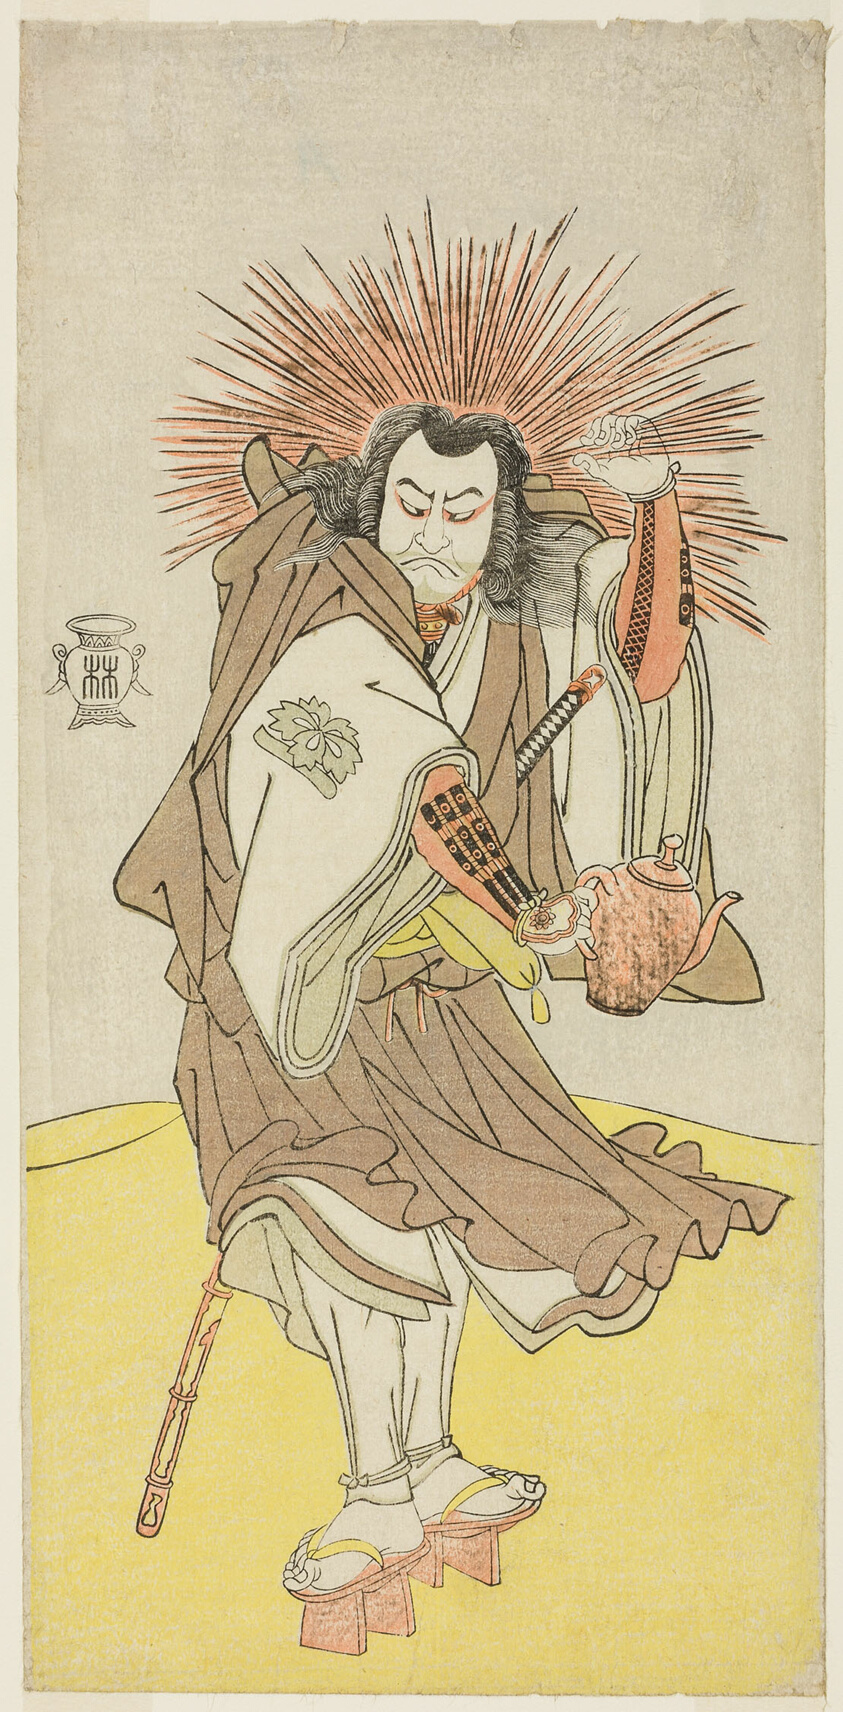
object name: Print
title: The Actor Nakayama Kojuro VI as Osada no Taro Kagemune (in Reality Hatcho Tsubute no Kiheiji), in the Guise of a Lamplighter of Gion Shrine, in Act Three from Part One of the Play Yukimotsu Take Furisode Genji (Snow-Covered Bamboo: Genji in Long Sleeves), Performed at the Nakamura Theater from the First Day of the Eleventh Month, 1785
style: Japanese (culture or style)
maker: Katsukawa Shunsho 勝川 春章; Japanese, 1726-1792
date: c. 1785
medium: Color woodblock print; hosoban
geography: Japan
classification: woodblock print; print; asian art